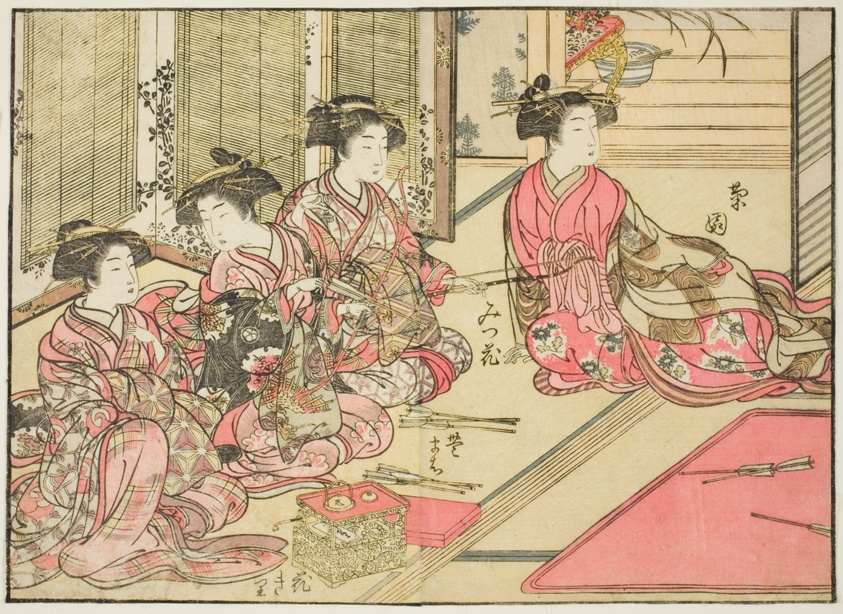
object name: Print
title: Courtesans of Kiriya, from the book "Mirror of Beautiful Women of the Pleasure Quarters (Seiro bijin awase sugata kagami)," vol. 2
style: Japanese (culture or style)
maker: Katsukawa Shunsho; Japanese, 1726-1792; Kitao Shigemasa; Japanese, 1739-1820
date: 1776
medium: Color woodblock print; double-page illustration cut from a book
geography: Japan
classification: woodblock print; print; asian art